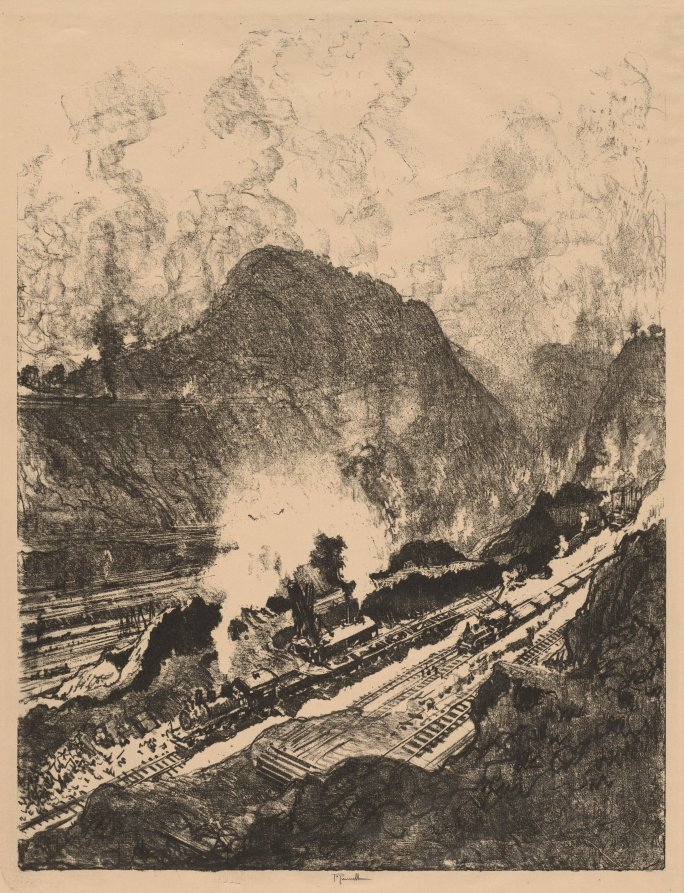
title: The Cut from Culebra, Panama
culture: America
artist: Joseph Pennell (American, 1857–1926)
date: 1912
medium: lithograph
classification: Print